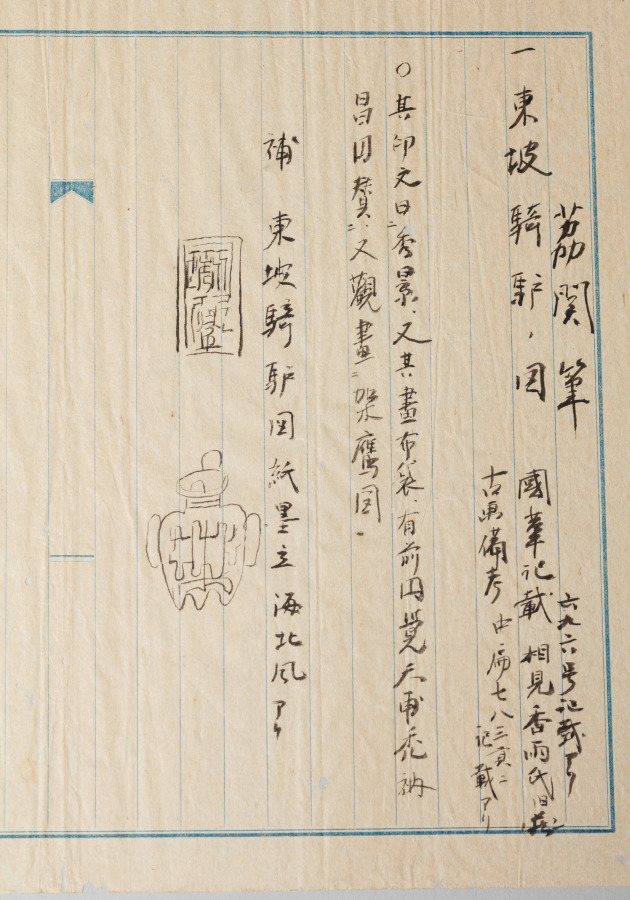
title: Su Dongpo Riding a Donkey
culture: Japan, Momoyama period (1573–1615)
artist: Reietsu (Japanese, active late 1500s to early 1600s)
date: late 1500s to early 1600s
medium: hanging scroll; ink on paper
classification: Painting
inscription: 落款 秀景 ？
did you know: Su Dongpo 蘇東坡 (1037–1101) was the leading Song dynasty poet and artist.